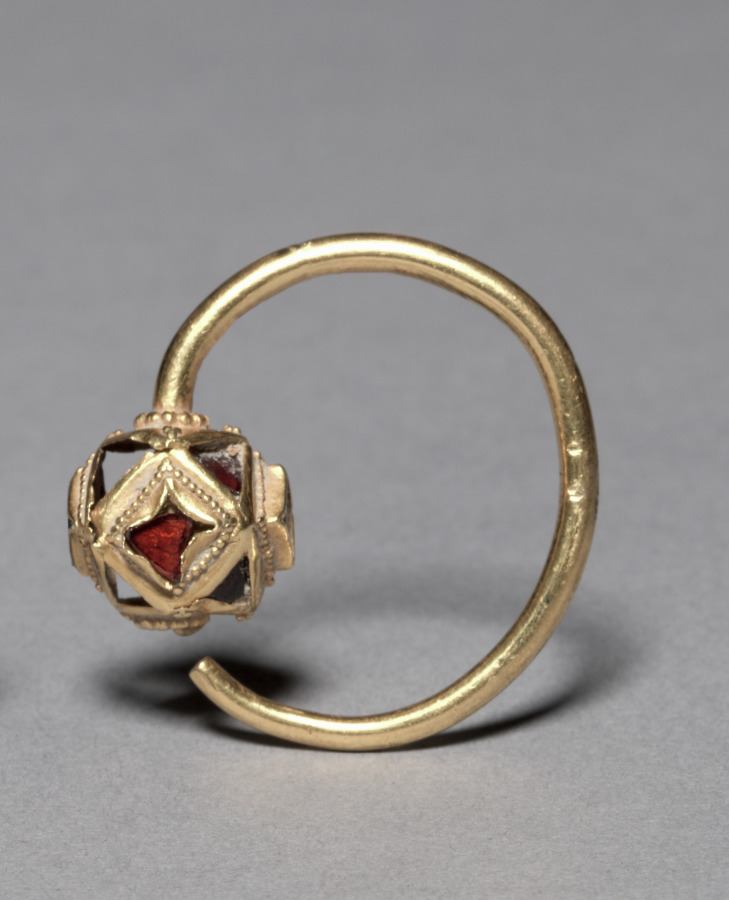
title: Earring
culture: Ostrogothic, Migration period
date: 400s CE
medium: gold with garnets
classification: Jewelry